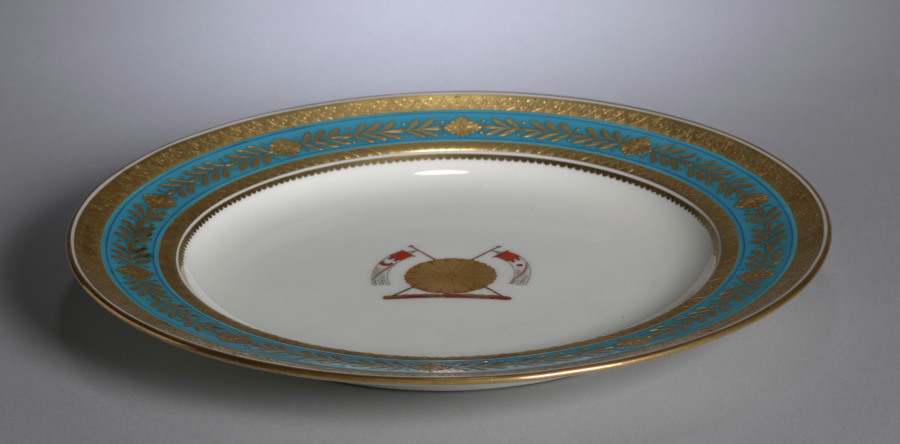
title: Plate made for Emperor Meiji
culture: England, 19th century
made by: Minton Pottery and Porcelain Factory (British)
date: c. 1875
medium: porcelain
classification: Ceramic